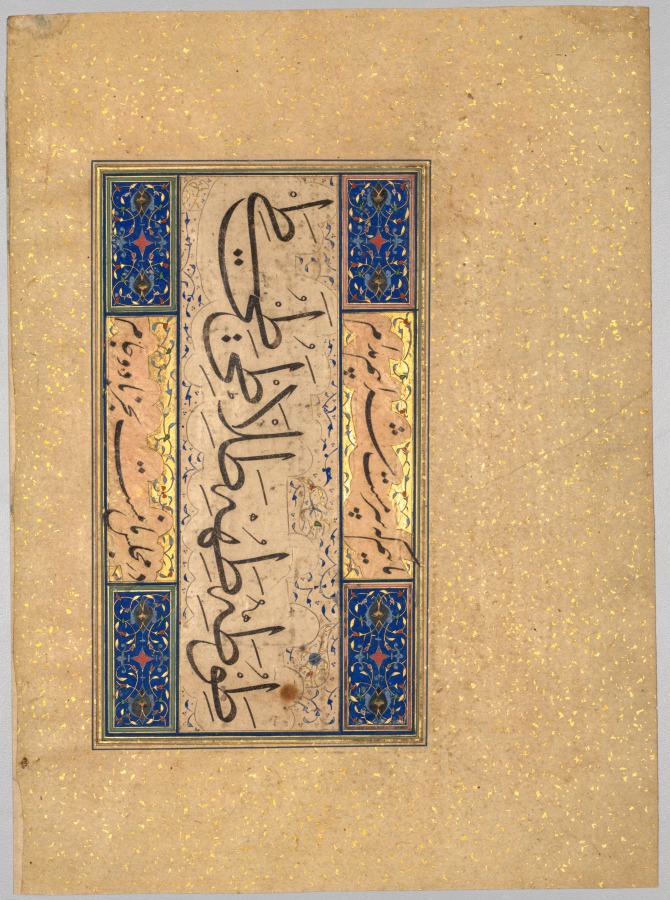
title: Persian Verse (khamriyya) (verso)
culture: Afghanistan, Herat, Safavid period (1501–1722)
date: c. 1509–59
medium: ink, gold, and opaque watercolor on paper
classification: Manuscript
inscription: [Persian khamriyya]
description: This page contains two quatrains—poems made up of four lines. The diagonally written text in the center of the page is a poem addressed to a ruler, expressing hope for his success and the downfall of his enemies. The second poem is split between the horizontal panels at the top and bottom of the page. This quatrain praises the beauty of the writer’s beloved, saying that “her moonlike face can steal away a hundred besotted hearts.” At the right are calligraphic exercises displaying letters of the alphabet and the virtuoso skill of the calligrapher Sultan Muhammad Khandan, who signed the page in the triangle at the lower left of the inner text block.